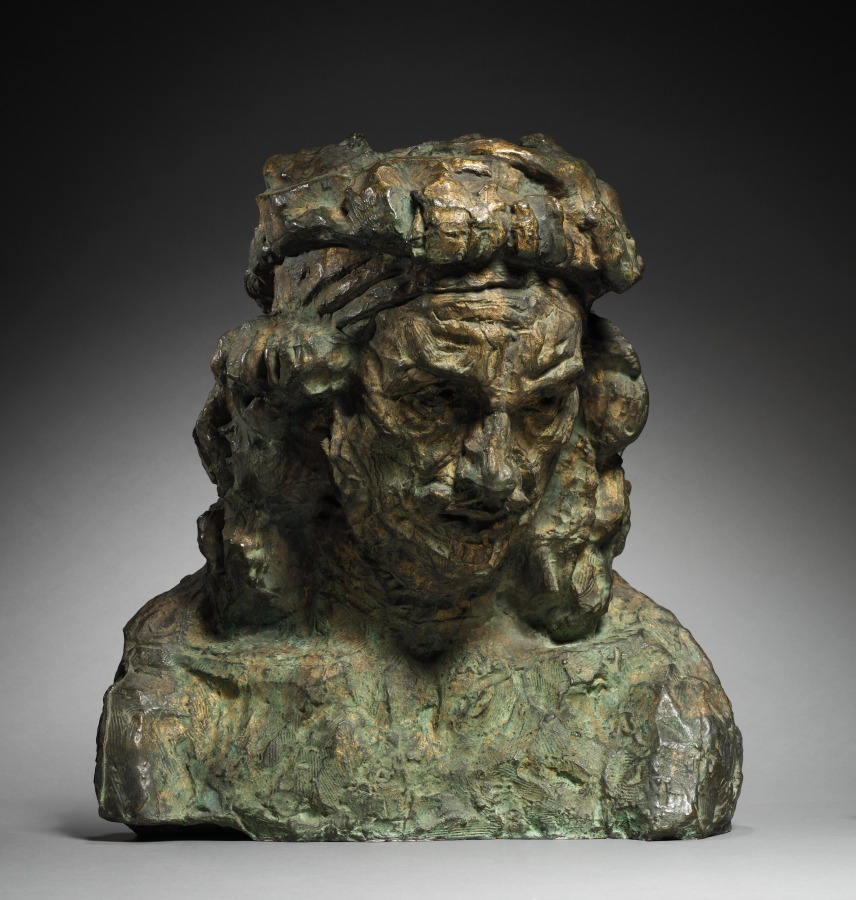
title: The End of Rembrandt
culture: France, 20th century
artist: Emile Antoine Bourdelle (French, 1861–1929)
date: 1909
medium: bronze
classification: Sculpture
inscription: Dated: "1909"